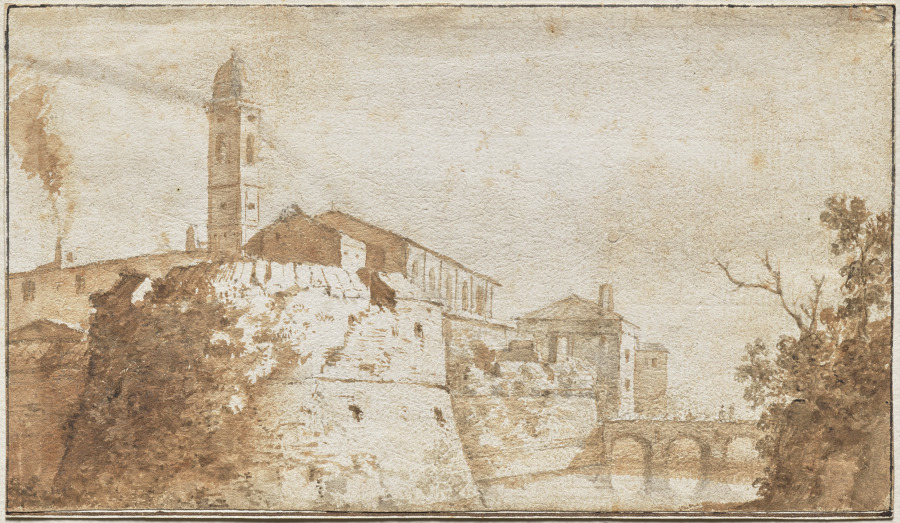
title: A View of Bracciano with the Church of S. Maria Assunta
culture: Netherlands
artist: Bartholomeus Breenberg (Dutch, 1599–1657)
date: c. 1619–33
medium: Brown and gray inks and washes applied with point of brush and brush, with traces of graphite underdrawing on cream antique laid paper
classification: Drawing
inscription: Written in brown ink on recto of mount, lower left: "Bracciano"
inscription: Written in brown ink on recto of mount, lower right: "J. Bischop"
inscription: Written in pencil on recto of mount, lower right: "610"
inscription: Written in pencil on verso of mount: "53"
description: In the early 1600s, artists from Northern Europe began to take long trips to Italy as part of their artistic training. Bartholomeus Breenberg traveled to Italy around 1620 and probably stayed for at least 12 years. While there, he sketched ancient ruins and the countryside, features he would use in his paintings when he returned to Amsterdam in the 1630s. The area around the Lago di Bracciano, a volcanic lake northwest of Rome, was home to several medieval villages that provided charming vistas for artists. In his view, Breenberg emphasized the crumbling turret of a medieval castle in Bracciano in front of the ordered, linear outline of the Church of Santa Maria Assunta beyond. Combining gray and brown ink washes to plot gradations in tone, he created vivid contrasts of light and shade, capturing the effects of the bright Italian sunshine.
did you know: In the early 17th century, European artists were just beginning to make sketches such as this one outdoors and onsite.